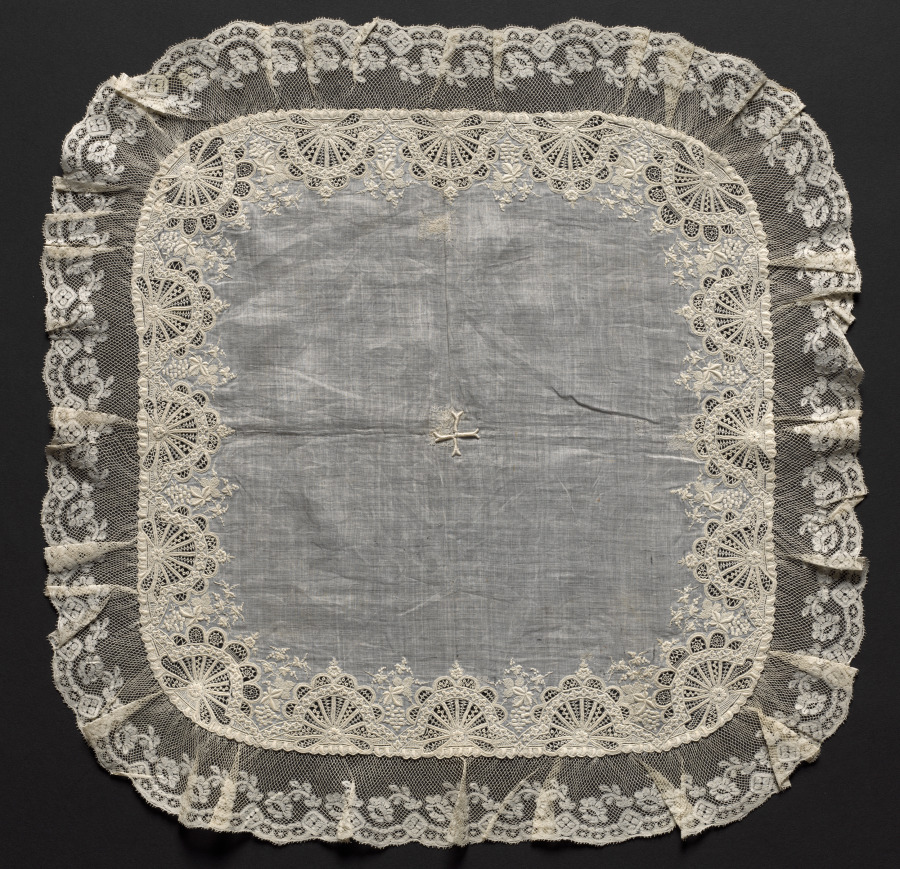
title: Lace Handkerchief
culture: Switzerland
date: 1850–99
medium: Plain weave linen center: bobbin lace (Valenciennes lace) edging and embroidery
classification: Embroidery